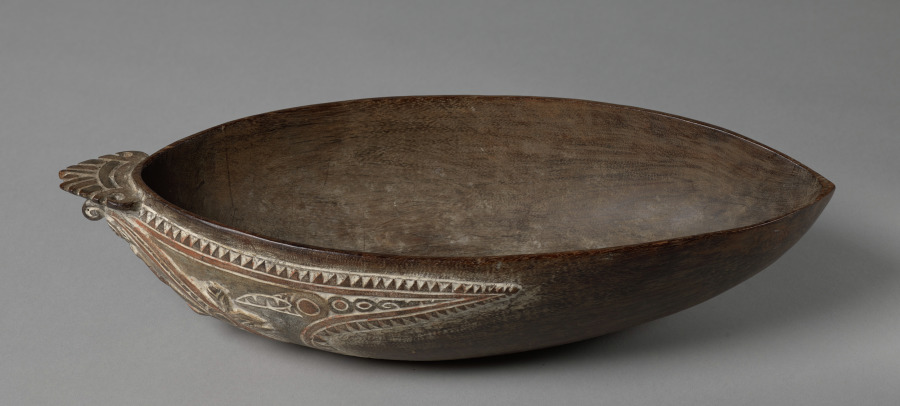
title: Bowl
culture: Melanesia, Papua New Guinea, Huon Gulf, Tami Islands, 19th century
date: 1800s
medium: painted wood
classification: Sculpture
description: The people of the Tami Islands manufactured canoes, house beams, drums, bowls, lime spatulas, and neckrests using tools such as stone axes, bamboo knives, tree-bear teeth, and pig, cassowary, and dog bones. Tami bowls were carved from the hard wood of the azalea and decorated with patterns that vary from deep etching to high relief. Many bowls were blackened with a graphite compound and highly polished. Decorative patterns were owned by specific families, and could not be used by other carvers.